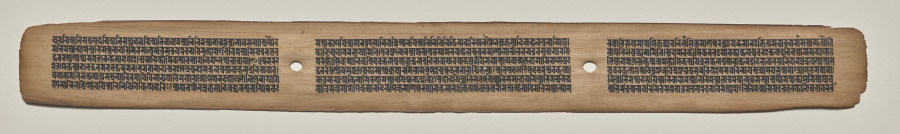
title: Text, Folio 41 (recto), from a Manuscript of the Perfection of Wisdom in Eight Thousand Lines (Ashtasahasrika Prajnaparamita-sutra)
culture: Eastern India, Bihar, Vikramashila Monastery. Painting: Nepal, Kathmandu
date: Sunday, September 14, 1119 (year 239 of the Newar Samvat in the month of Ashvina)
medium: gum tempera and ink on palm leaves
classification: Painting